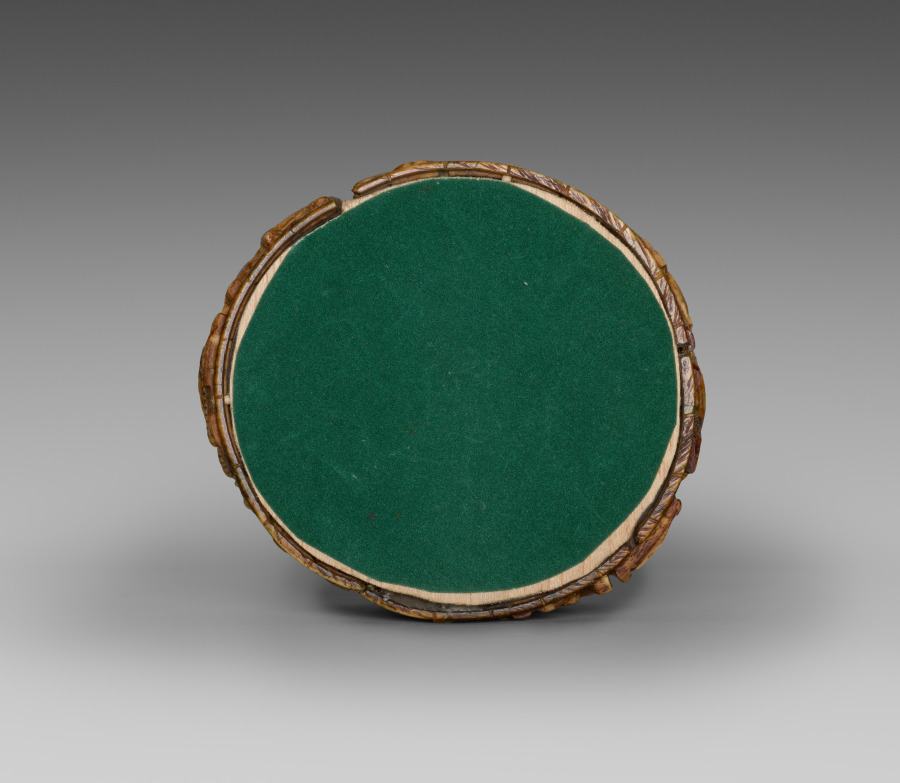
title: Ivory Pyx (Box)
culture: Byzantium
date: 500s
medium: ivory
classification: Ivory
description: Elaborately carved from a section of an elephant’s tusk, this ivory pyx (Greek for "box") depicts a number of New Testament scenes, namely the Annunciation, Christ’s entry into Jerusalem, Christ raising Lazarus, and Christ healing the blind man. It also depicts a Christian altar with chalices, possibly indicating the box’s use in a liturgical context.